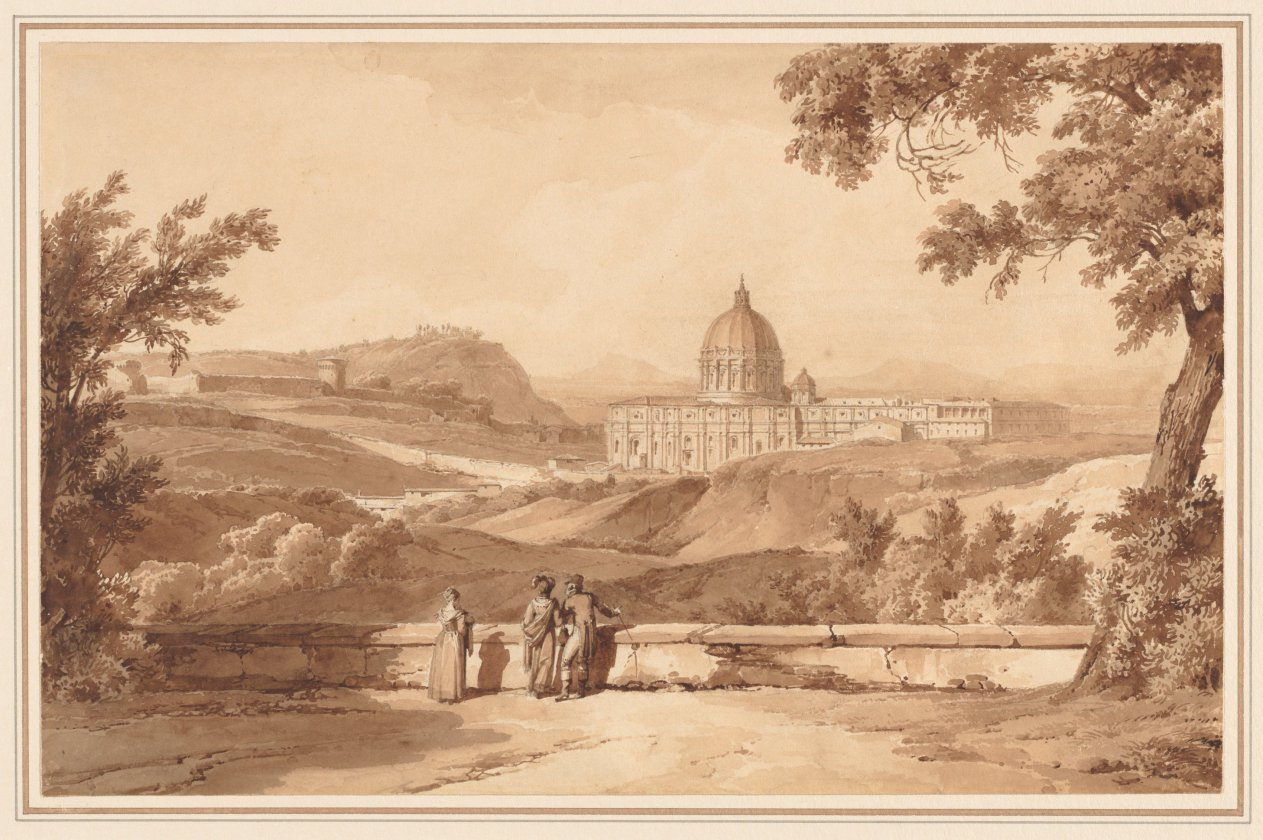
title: View of St. Peters, Rome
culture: France, 19th century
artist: Achille Etna Michallon (French, 1796–1822)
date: c. 1817–20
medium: Pen and brown ink and brush and wash over graphite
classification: Drawing